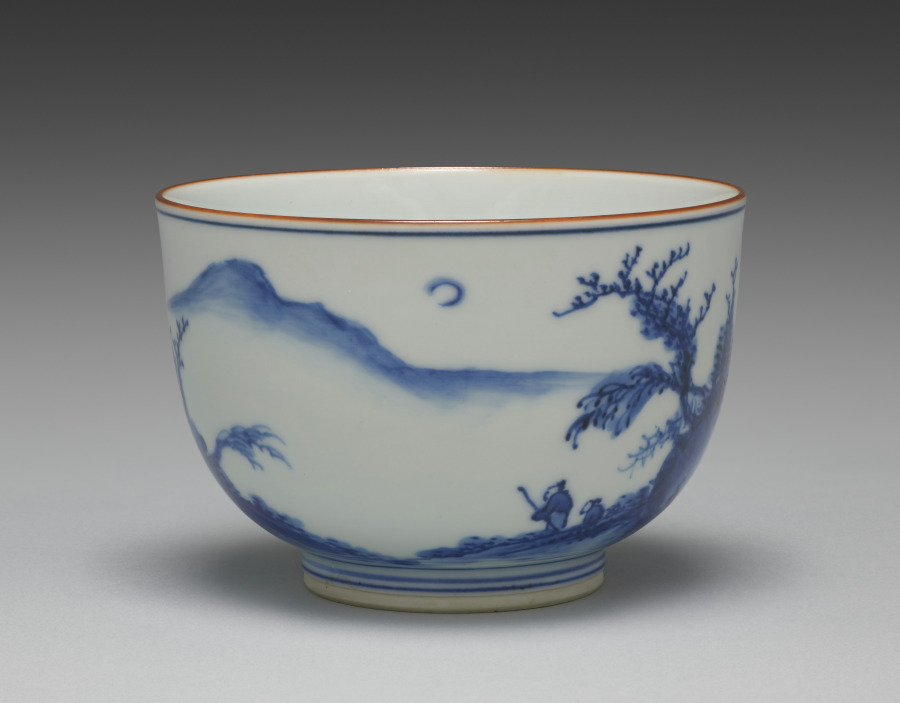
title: Bowl with Chinese Landscape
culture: Japan, Meiji period (1868–1912)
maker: Seifū Yohei III (Japanese, 1851–1914)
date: 1893–1914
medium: porcelain with underglaze blue and overglaze red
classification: Ceramic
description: This bowl has a landscape with figures in blue and iron oxide. The scene is set along a river with mountains in the distance, likely in the Jiangnan region of southern China, famous for compositions of the Eight Views of the Xiao and Xiang Rivers and of West Lake in Hangzhou. There are two people in the foreground: one person fishes along the riverbank across from a rustic hermit’s lodge sited on stilts over the water’s edge; on the other side of the bowl, a person with a tall staff gazes at the full moon, accompanied by his servant. The foot has a double band in blue, while another blue band encircles the bowl just beneath the rim, which is covered in red iron oxide. The inside of the footring is also circled in blue around the impressed mark.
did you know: The flock of geese making its way across the sky and the many bare tree branches suggest the season may be autumn.